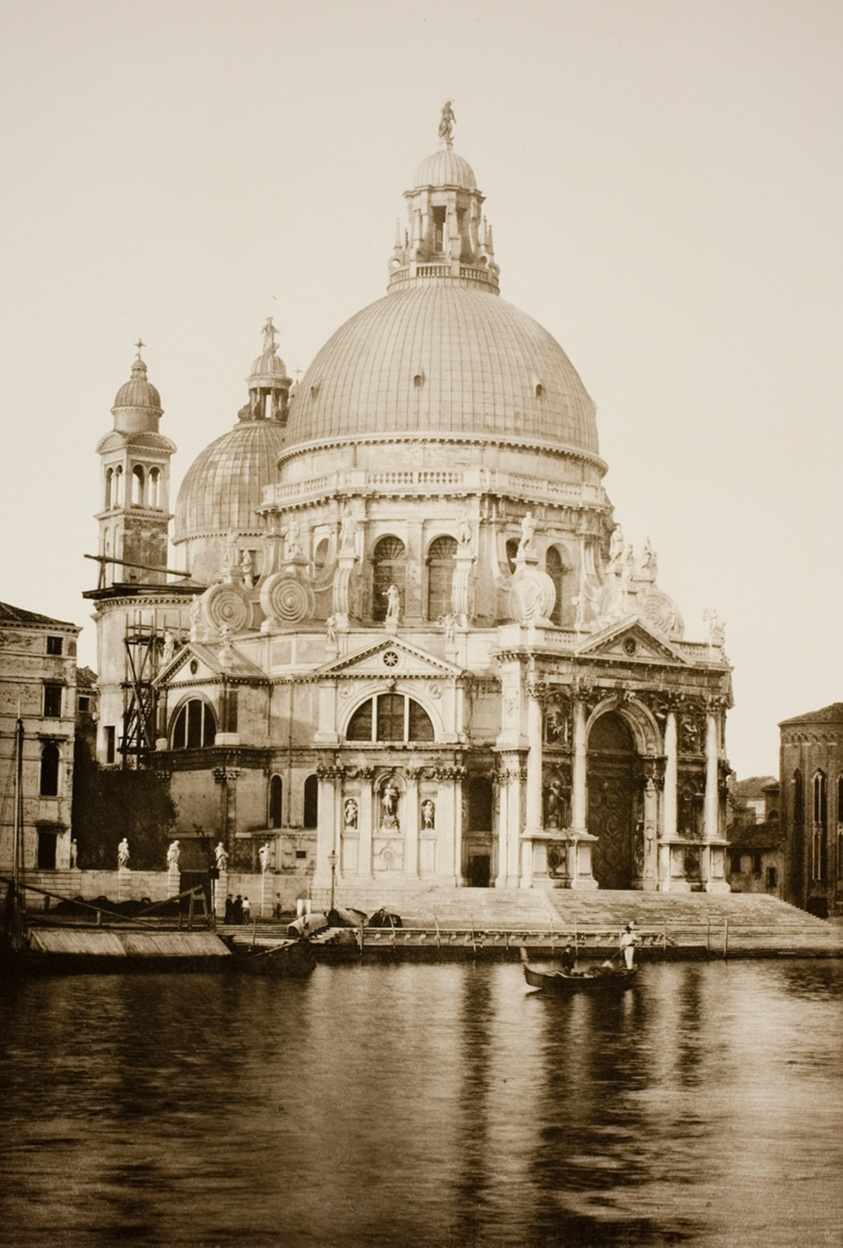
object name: Photograph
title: Untitled (41)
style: 19th century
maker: edited by Ferdinando Ongania; Italian, 1842–1911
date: c. 1890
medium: Photogravure, No. 41 from the portfolio "Calli, Canali e Isole della Laguna"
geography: Italy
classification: photograph; photography